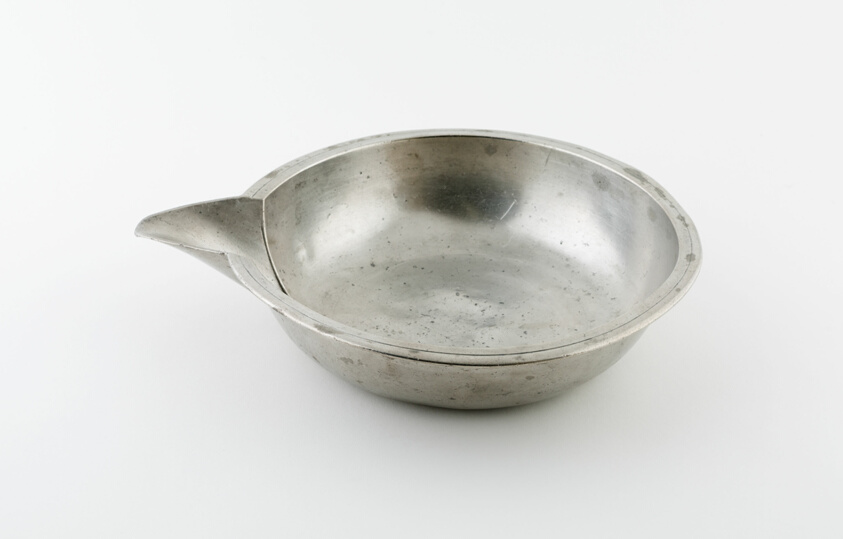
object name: Metalwork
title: Basin with Spout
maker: England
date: c. 1750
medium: Pewter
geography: England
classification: pewter; metalwork; european decorative arts